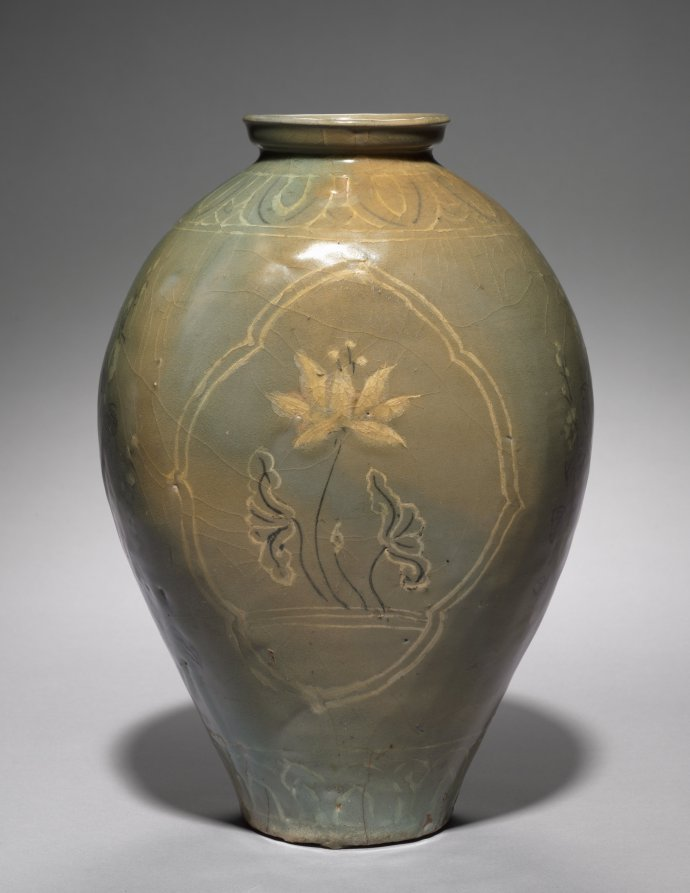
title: Flask with Inlaid Lotus Design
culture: Korea, Goryeo dynasty (918–1392)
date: 1200s–1300s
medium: stoneware, celadon with inlaid decoration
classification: Ceramic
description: Toward the late 1300s, the overall quality of techniques involved in making celadon works sharply deteriorated. In contrast to translucent greenish blue celadon works of the 1100s, this flask, possibly dated to the late 1300s, has brownish green glaze. And its inlaid design also shows a clear sign of decline in craftsmanship. Nevertheless, less attention to techniques gave way to a freer style pottery called buncheong in the succeeding centuries.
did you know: The shape of this bottle can be traced all the way back to an ancient Persian pilgrim’s flask.